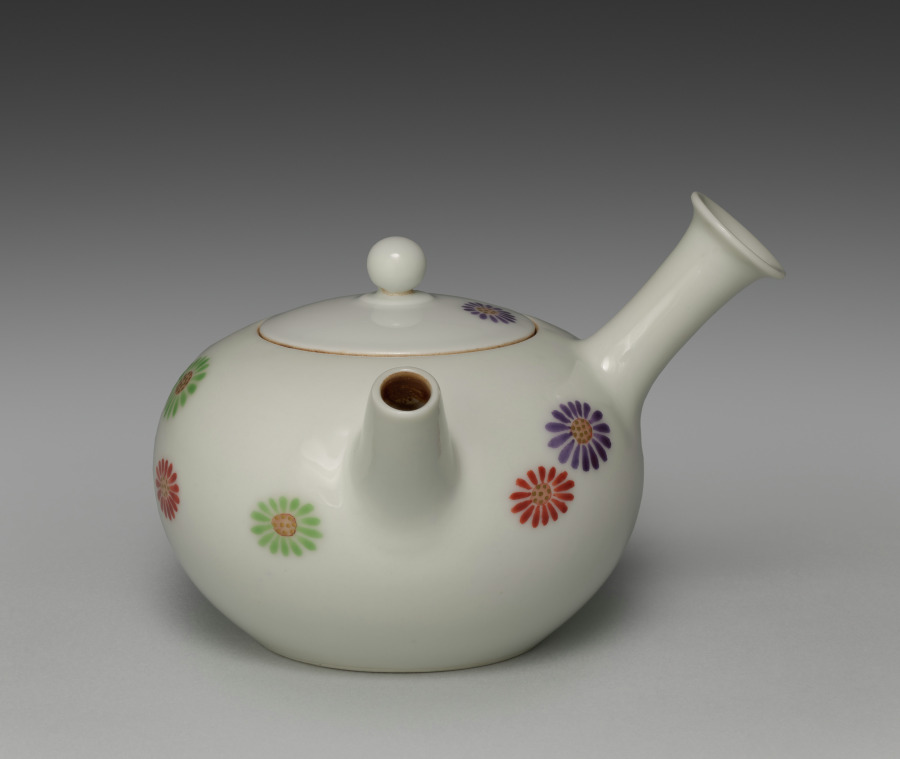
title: Teapot with Chrysanthemum Motifs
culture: Japan, Meiji period (1868–1912)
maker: Seifū Yohei III (Japanese, 1851–1914)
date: 1912–14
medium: Porcelain with overglaze color enamel and gold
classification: Ceramic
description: This side-handled sencha teapot has the lid flush against the body, forming an oblong orb. It is decorated with a sprinkling of similar chrysanthemum motifs in red, green, and purple overglaze color enamels with centers of pale red dotted with gold.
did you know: This teapot with chrysanthemum motifs shows off Seifū Yohei III’s technique of enamels painted over the glaze.